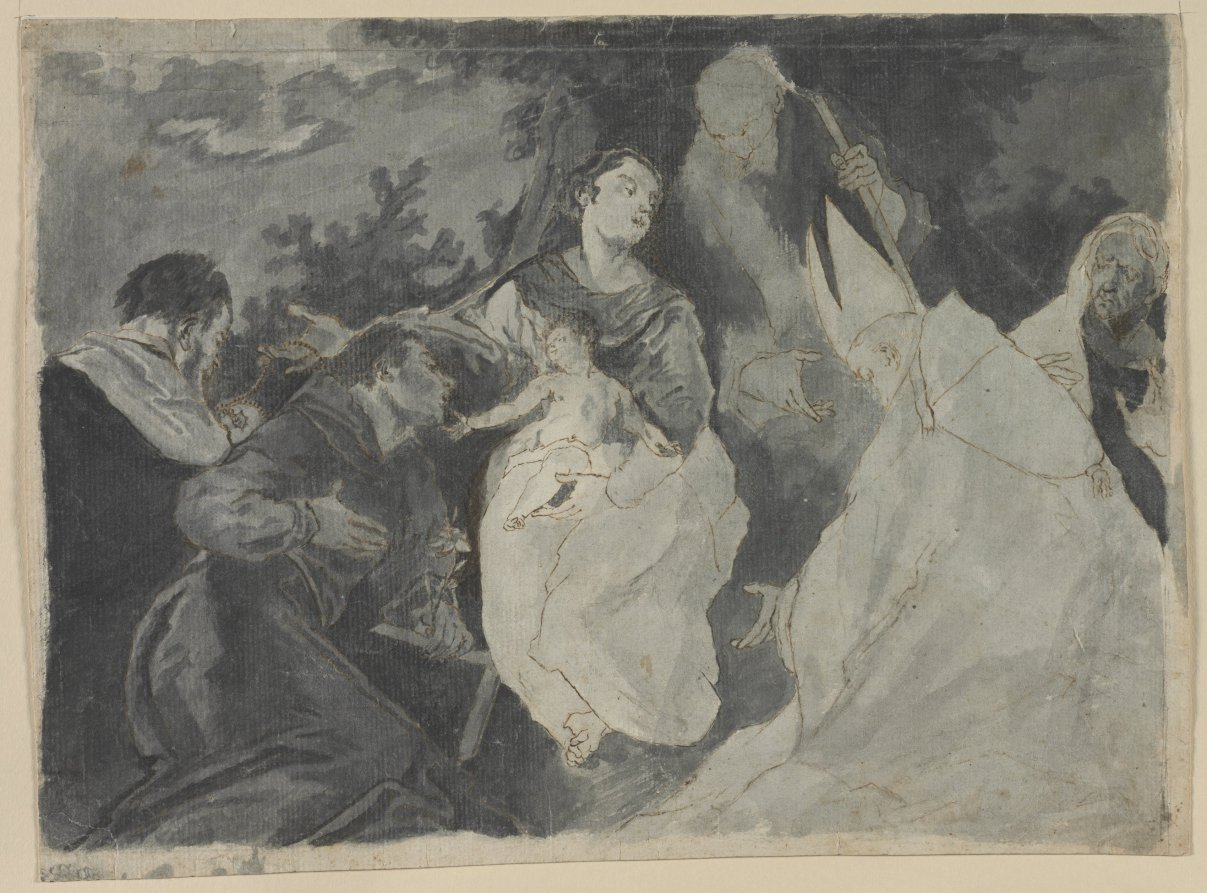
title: Madonna and Child with Saints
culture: Italy, 18th century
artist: after Giuseppe Bazzani (Italian, 1690–1769)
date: 1700s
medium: pen and brown ink and brush and gray wash, with traces of black chalk and brush and brown wash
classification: Drawing